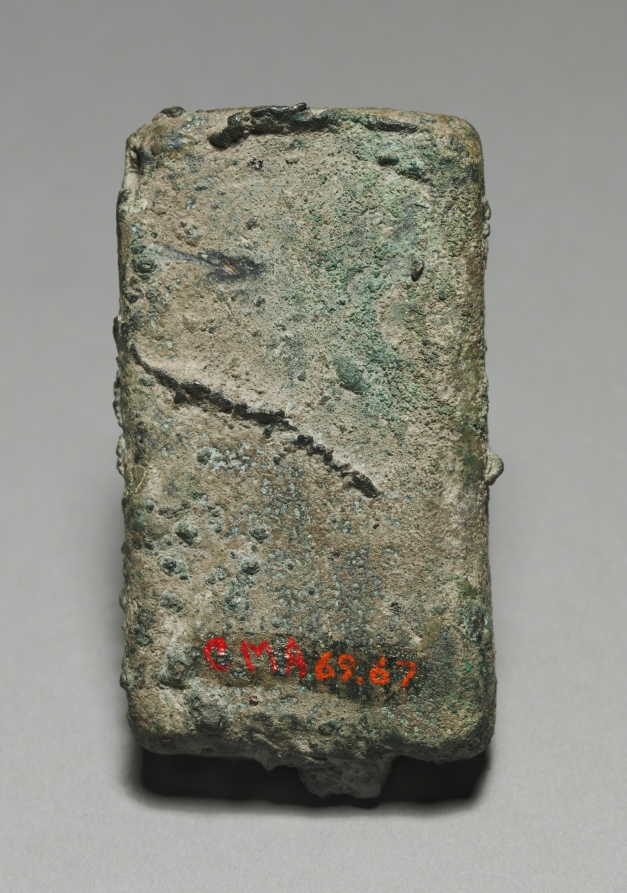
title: Hand Drummer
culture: Assyrian, Iraq or possibly Syria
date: 900–700 BCE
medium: bronze, solid cast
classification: Metalwork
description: This plaque is probably one of several that decorated the side of a throne. The man's hair and costume are similar to those on the huge wall relief, and they are probably about the same date.